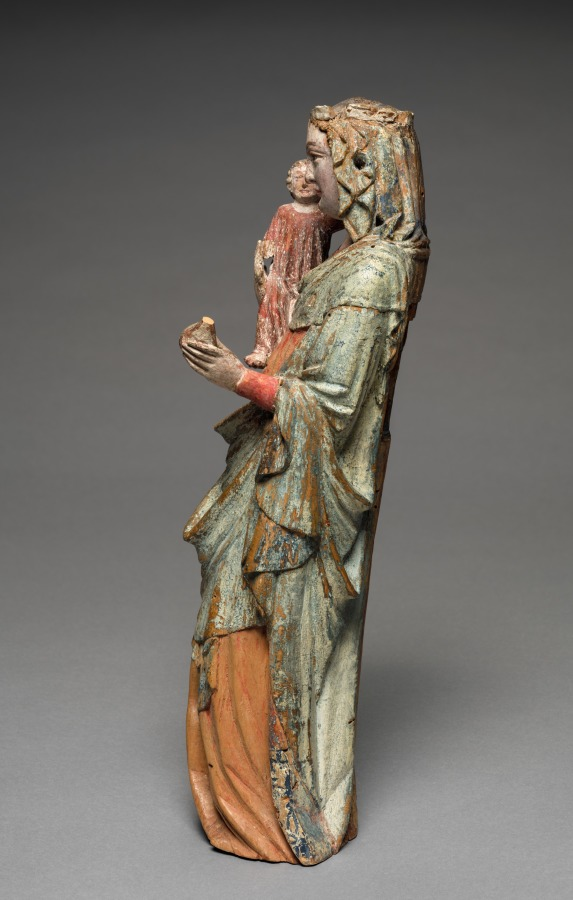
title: Reliquary Statuette of the Virgin and Child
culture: Austria, Salzburg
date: c. 1330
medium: painted lindenwood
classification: Sculpture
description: A small rectangular cavity in the back of this sculpture reveals that it was originally made to serve as a reliquary (a container for relics). In her left hand the Virgin holds a pear, a symbol of the peace and love of Christ.